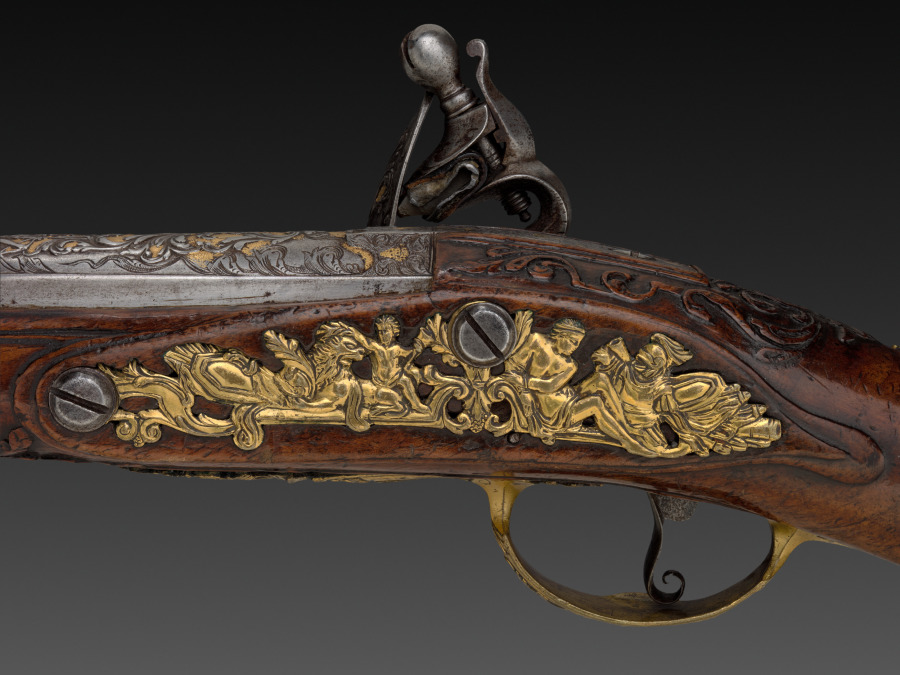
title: Flintlock Pistol (1 of 2)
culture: Franco-Flemish, Liège, early 18th century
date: early 1700s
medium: steel with gold inlay, gilt-brass mounts; walnut burl stock; chiseled high-relief decoration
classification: Arms and Armor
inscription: on barrel: G. MASSIN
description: The exquisite ornament along the breech of the barrel is chiseled and engraved. The barrel of this pistol is signed g. massin, the name of a gunsmith working in eastern France or French-speaking Flanders, possibly the city of Liège.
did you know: The flintlock ignition system was developed in the 1600s and remained the dominant system until the early 1800s.